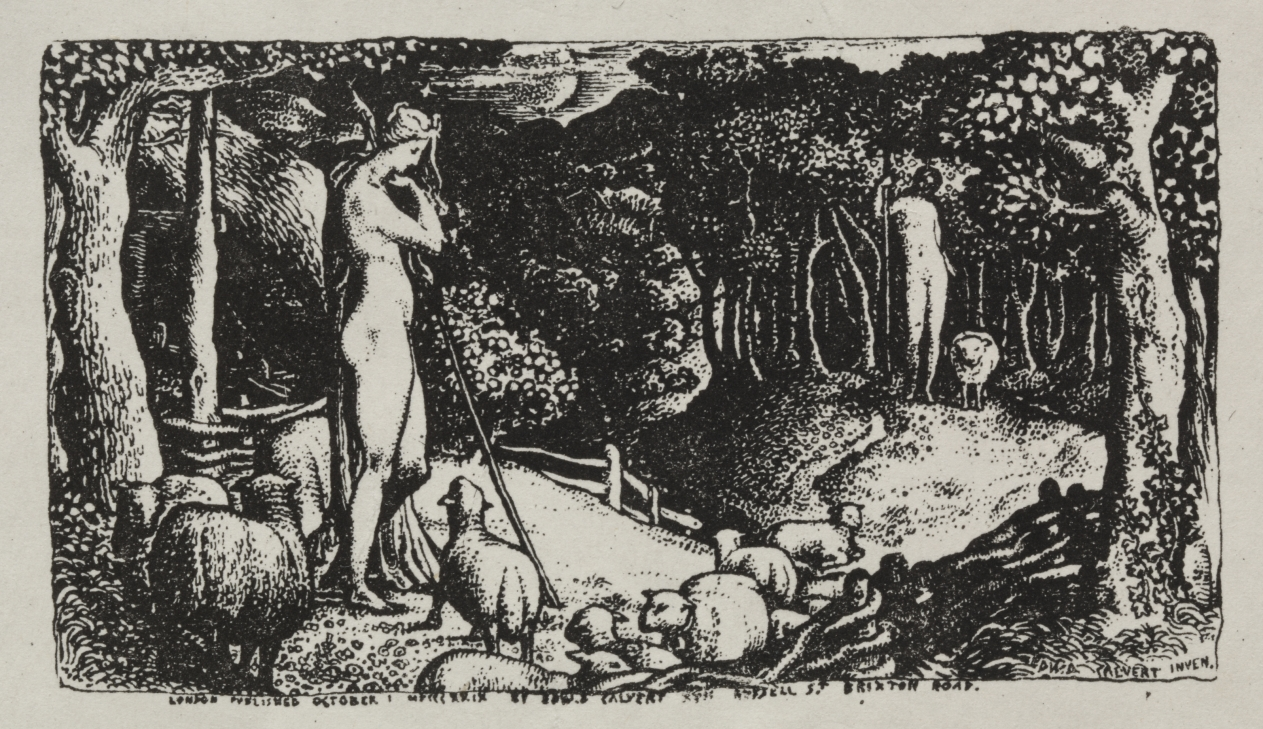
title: Ideal Pastoral Life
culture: England, 19th century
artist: Edward Calvert (British, 1799–1883)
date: 1829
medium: lithograph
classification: Print